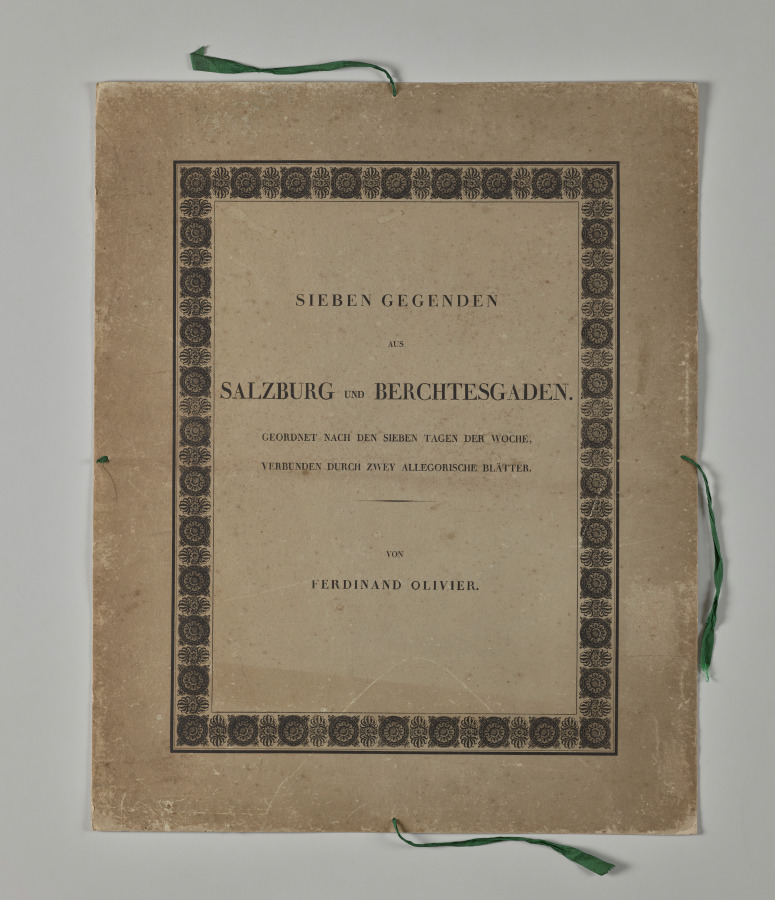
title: Seven Areas from Salzburg and Berchtesgaden. Arranged according to the seven days of the week, connected by two allegorical sheets (Slipcover)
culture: Germany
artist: Ferdinand Olivier (German, 1785–1841)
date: 1818–23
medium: Original slipcase cover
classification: Portfolio